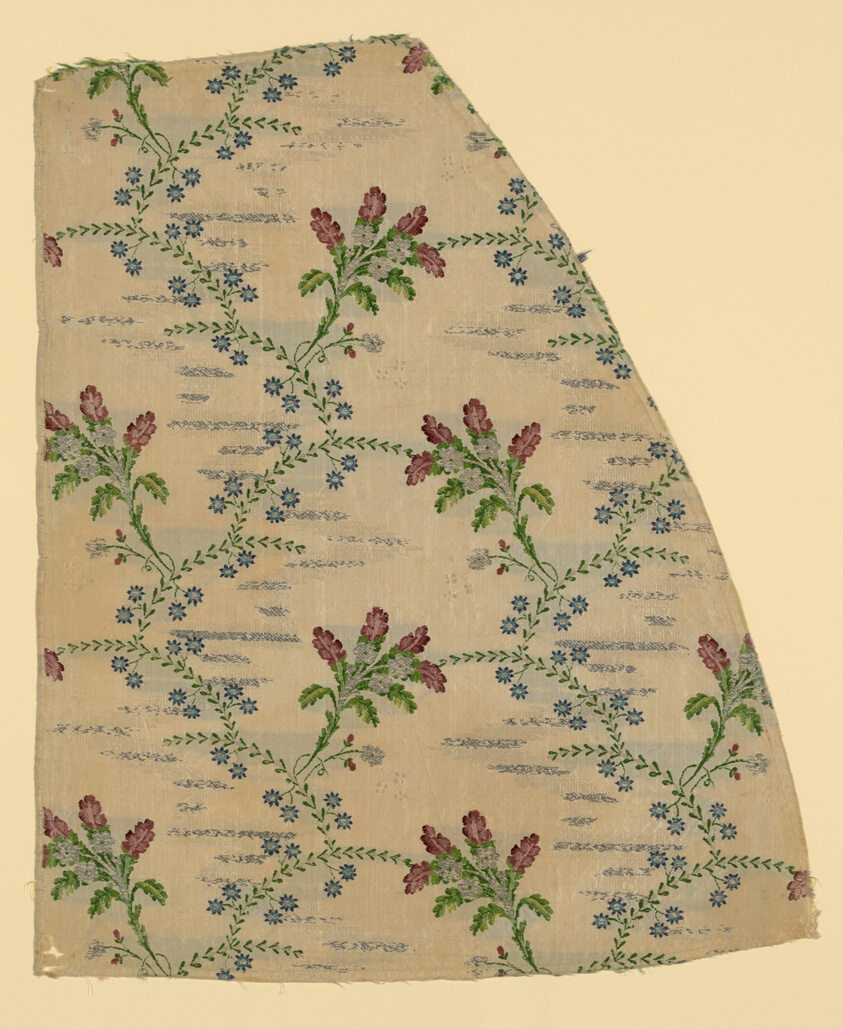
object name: Textile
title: Fragment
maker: France or Italy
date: 18th century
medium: Silk and gilt metal strips, plain weave; with supplementary patterning and brocading wefts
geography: France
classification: textile; weaving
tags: foliage, lattices